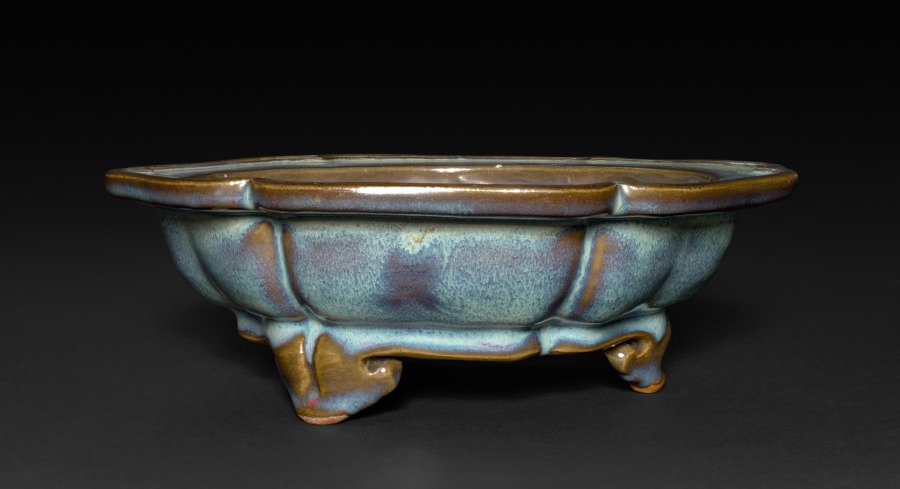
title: Flower Pot Stand or Bulb Bowl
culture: China, possibly Henan province, Yuan dynasty (1271-1368) - Ming dynasty (1368-1644)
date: 1300s–1400s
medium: glazed gray stoneware, Jun ware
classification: Ceramic